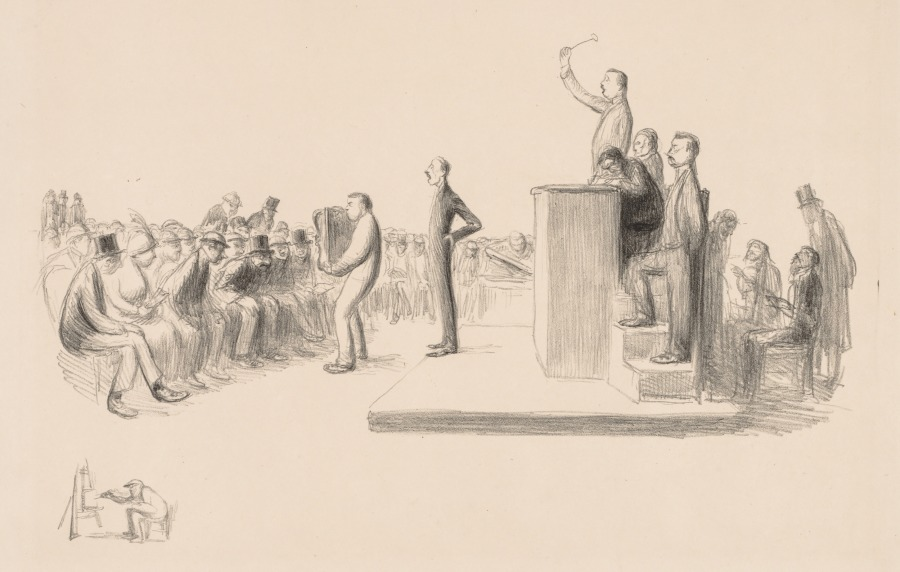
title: The Rouart Sale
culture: France, 19th century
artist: Jean Veber (French, 1864–1928)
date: c. 1912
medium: lithograph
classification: Print